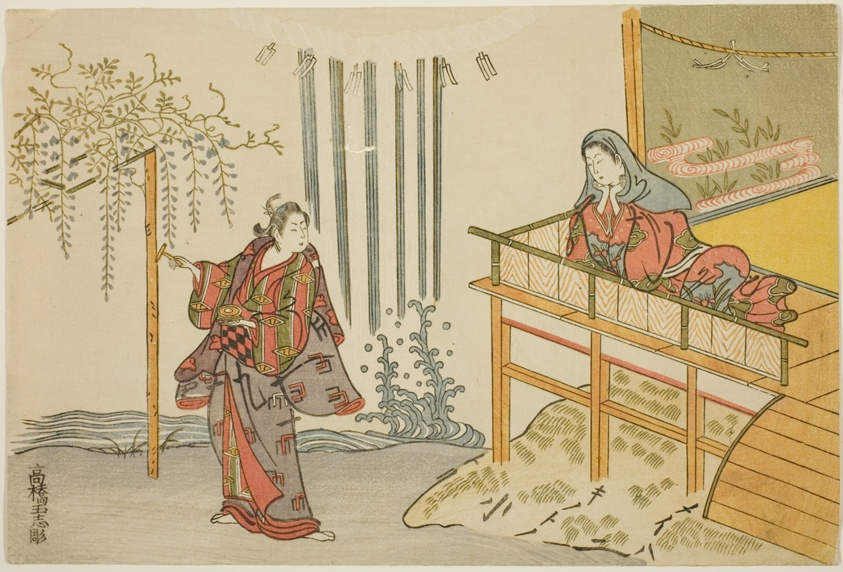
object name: Print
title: Parody of the Story of Narukami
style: Japanese (culture or style)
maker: Artist unknown; Japanese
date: 1765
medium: Color woodblock print; chuban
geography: Japan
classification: woodblock print; print; asian art